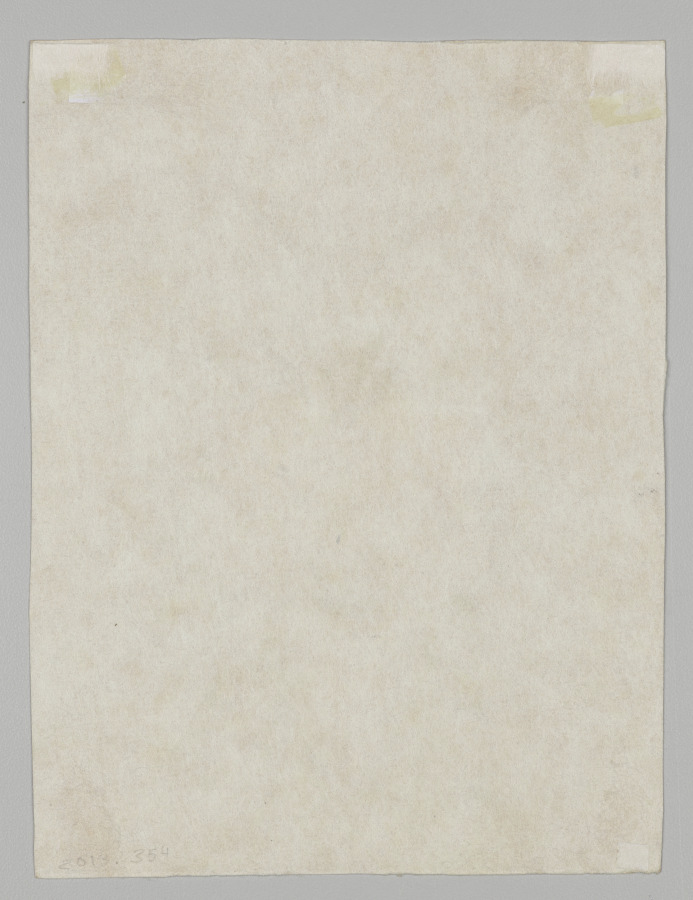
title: Vase with flower arrangement and scrollwork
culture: Mughal India, Lucknow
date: c. 1750–1800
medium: Gum tempera and gold on paper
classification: Painting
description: The symmetry of the floral arrangement emerging from the blue-and-white porcelain vase reveals an idealized vision. The overflowing vase is among the most ancient motifs in Indian art, used to convey the concept of abundance. This image, made for an elite patron of northern India, implies the prosperity that has accrued from international connections. The vase, painted with a European-style landscape, is of the type that was made in China for export to Europe. The scrolling ornament on either side may be ultimately derived from Persian motifs, but reworked into a European style, painted by Indian artists.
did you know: The blue bell-shaped flowers may be neelakurinji, which bloom once every twelve years.